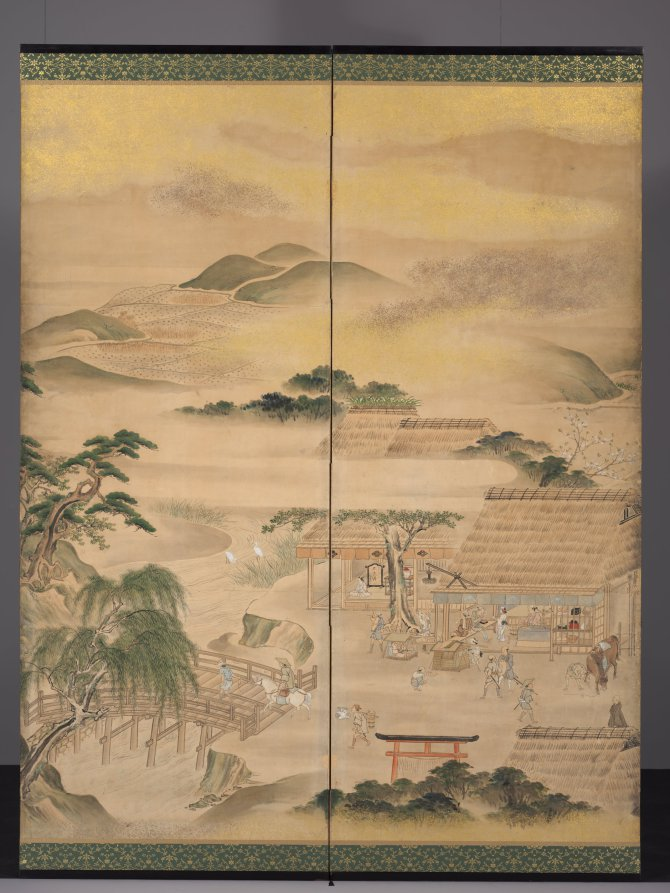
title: Spring and Autumn Farming (Spring)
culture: Japan, Edo period (1615–1868)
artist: Kō Sūkoku (Japanese, 1730–1804)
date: 1700s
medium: Six-panel folding screen, ink, light color, gold, and silver on paper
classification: Painting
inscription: Signature of the artist: "Enrin san jin Rakushisai ko Sukoku ga" (each screen)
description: These screens present the cycle of the farming year, starting with spring at right and ending with fall at left. Close examination of these screens reveals moments of games and amusement, the enjoyment of meals as well as intellectual and spiritual pursuits interspersed among the scenes of cultivating and preparing the rice harvest. The artist Kō Sūkoku is considered the 18th-century heir in style and attitude to Hanabusa Itchō (1652–1724). Itchō’s work incorporated elements from Kano school, ukiyo-e, and literati styles of painting. Kō trained with one of Hanabusa’s pupils, Sawaki Sūshi, who was best known for scenes depicting everyday life and customs.